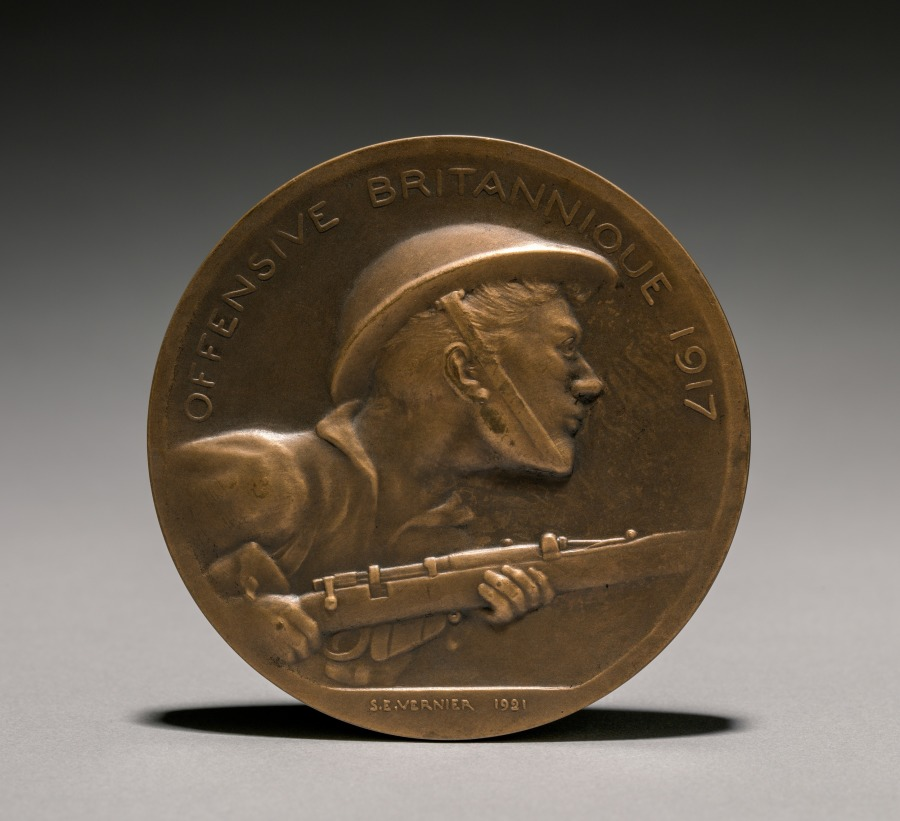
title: Medal (obverse)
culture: France, early 20th century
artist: Èmile Séraphin Vernier (French, 1852–1927)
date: 1921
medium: bronze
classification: Metalwork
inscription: "Offensive Brittanique 1917"; signed: "S. E. Vernier, 1921."